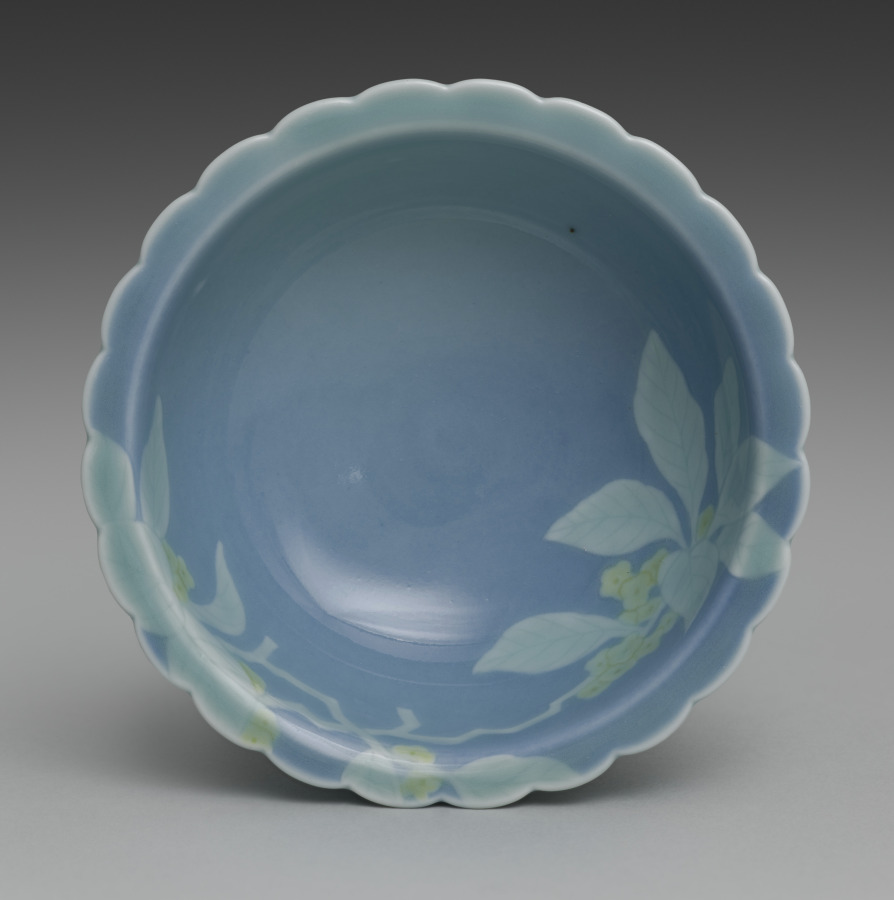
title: Dish from Dishes with Flowers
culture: Japan, Taishō period (1912–26) or Shōwa period (1926–89)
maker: Seifū Yohei IV (Japanese, 1872–1951)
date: 1914–46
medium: One from a set of five dishes; porcelain with underglaze yellow and blue glaze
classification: Ceramic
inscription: 清風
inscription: 清風造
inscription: 成山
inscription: 清風盧人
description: One can imagine a cool summer breeze when looking upon this set of dishes, each shaped with a crenulated mouth and glazed with blue. Around the rim and into the basin, the bowls have low-relief designs of flowers with underglaze yellow petals; their leaves and stems show white through the glaze. On each dish, the design continues over the rim onto one side.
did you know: Seifū Yohei IV’s dishes with flowers feature underglaze yellow.